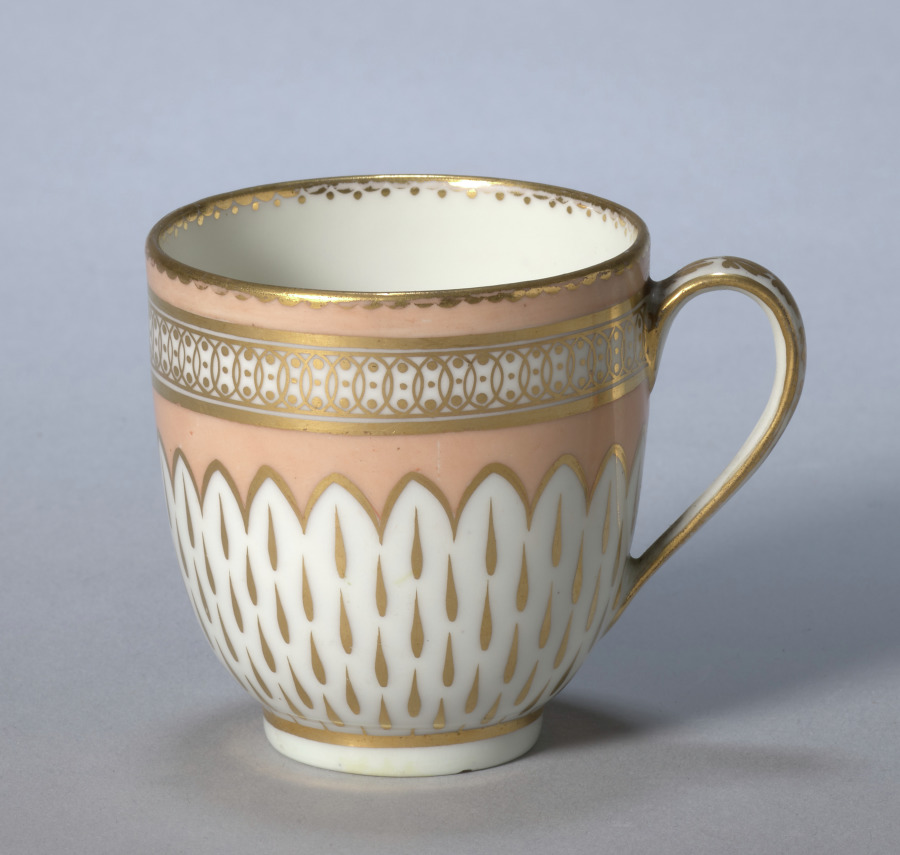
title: Cup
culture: England, Derby, early 19th century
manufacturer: Derby (Crown Derby Period) (British)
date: c. 1800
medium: porcelain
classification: Ceramic